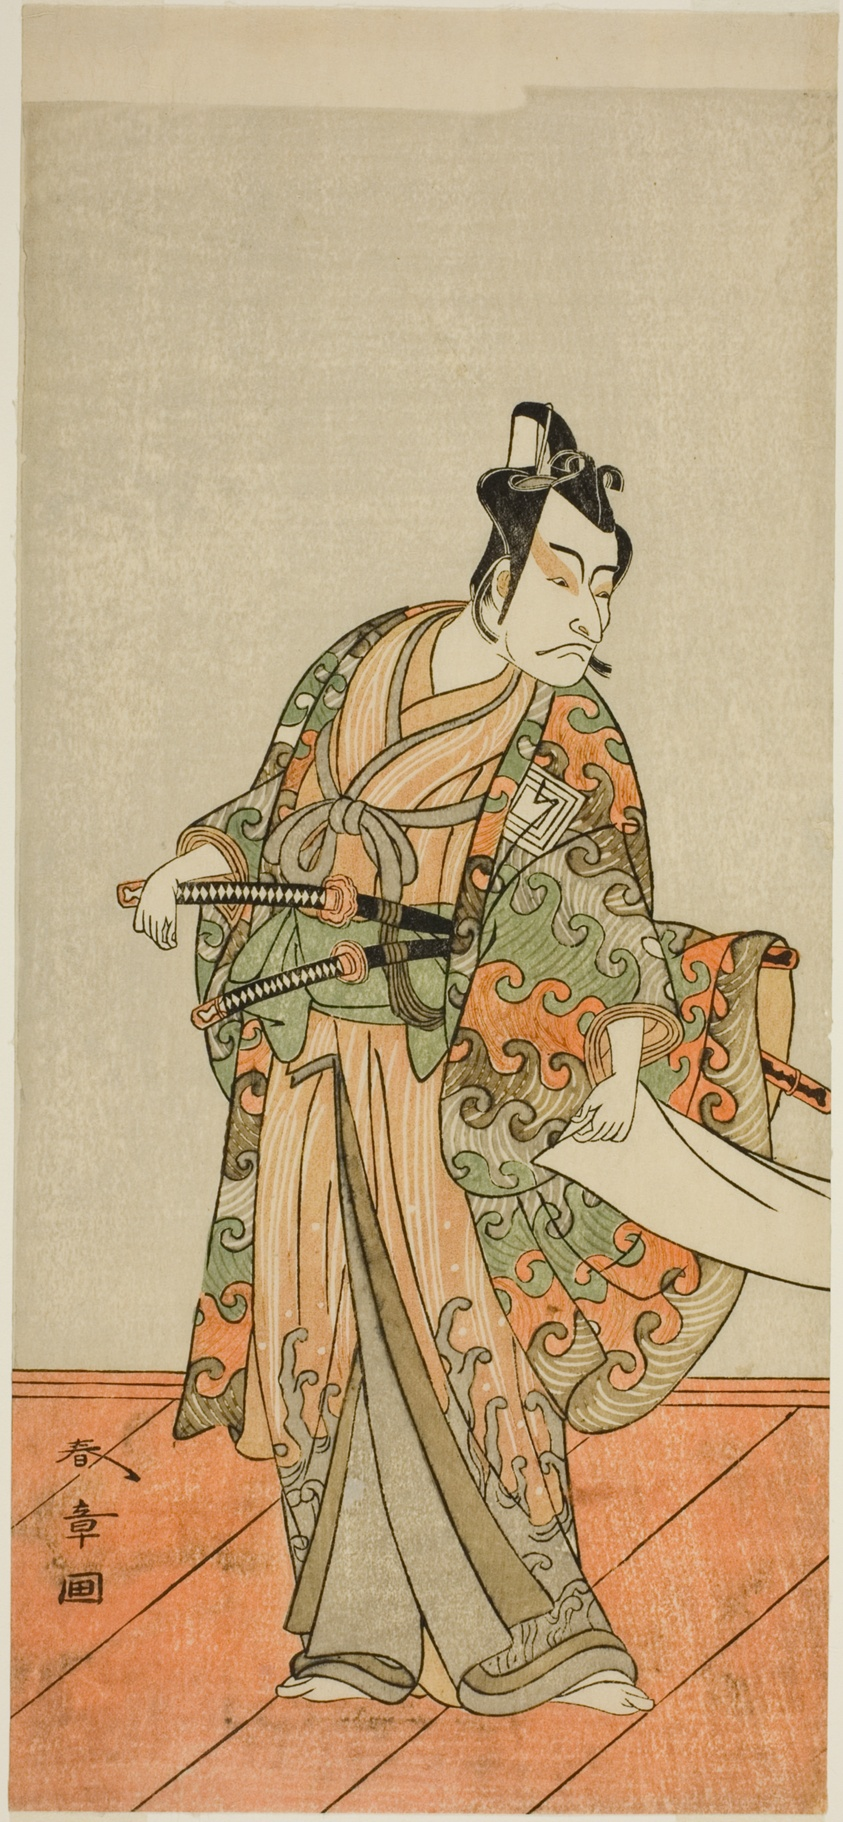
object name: Print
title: The Actor Ichikawa Danjuro V as Kudo Kanaishi (?) in the Play Izu-goyomi Shibai no Ganjitsu (?), Performed at the Morita Theater (?) in the Eleventh Month, 1772 (?)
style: Japanese (culture or style)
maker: Katsukawa Shunsho 勝川 春章; Japanese, 1726-1792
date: c. 1772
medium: Color woodblock print; hosoban; left sheet of a multisheet composition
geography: Japan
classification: woodblock print; print; asian art